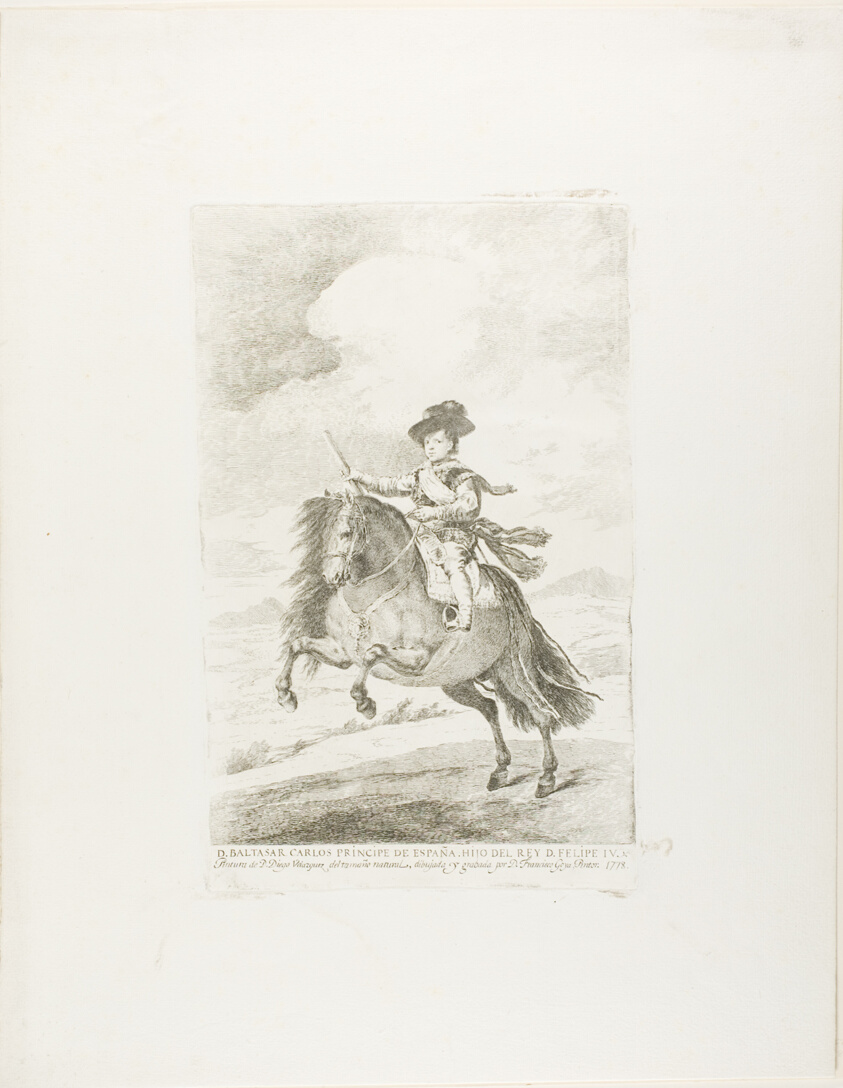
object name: Print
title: Baltasar Carlos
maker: Francisco José de Goya y Lucientes (Spanish, 1746-1828); after Diego Velázquez (Spanish, 1599-1660)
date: 1778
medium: Etching and drypoint with engraved inscription on ivory laid paper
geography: Spain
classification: etching; print; prints and drawing